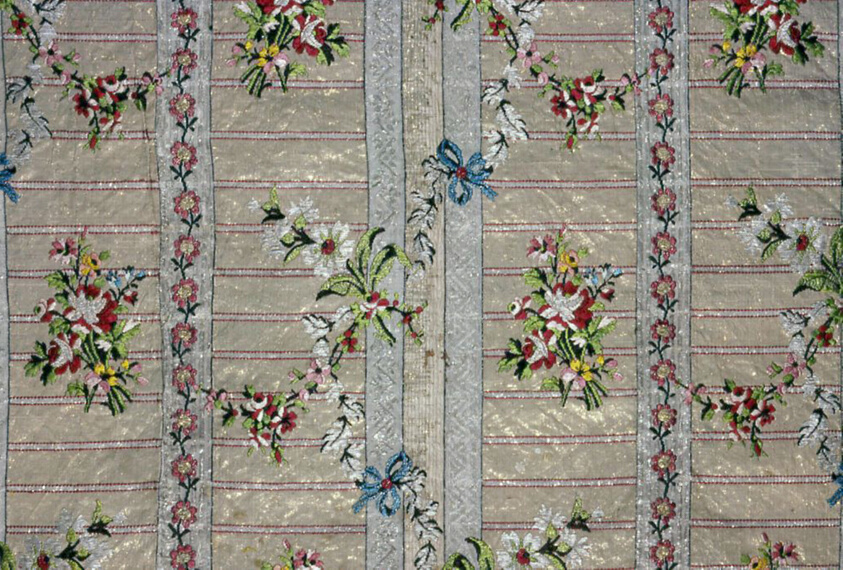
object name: Textile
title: Panel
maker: France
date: 18th century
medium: Silk, gold metal strip, silver metal strip, gold metal strip wrapped around silk fiber core, silver metal strip wrapped around a silk fiber core, warp-float faced twill weave with supplementary patterning warps, supplementary patterning wefts, and supplementary brocading wefts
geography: France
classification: textile; weaving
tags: flowers